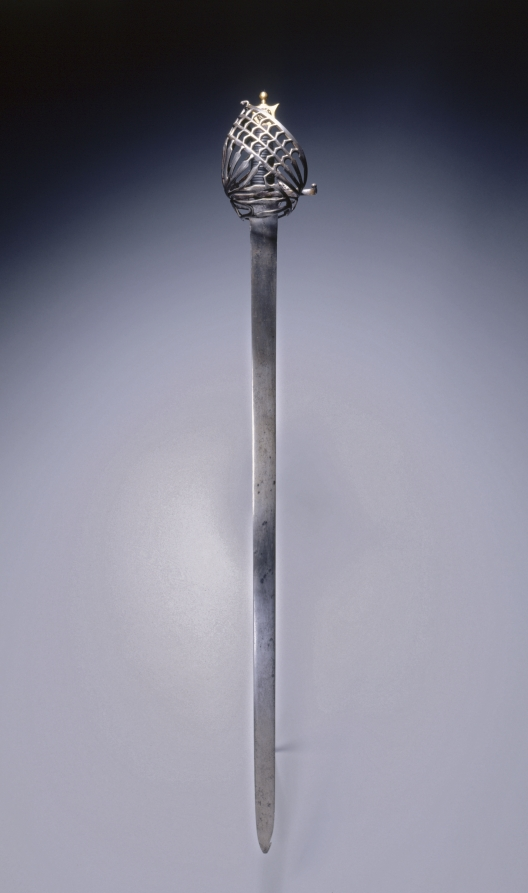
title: Schiavona Broadsword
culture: Italy, Venice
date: early 1700s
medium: steel, leather, wood, brass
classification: Arms and Armor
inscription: blade inscribed: POTZDAM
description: The schiavona-type broadsword features a complex barred guard that slopes forward. Its name derives from the Italian word for "Slavonic" and refers to the Slavonian corps who served as bodyguards to the Doge of Venice until the end of the Venetian Republic in 1797. Such swords were popular mainly with Venetians.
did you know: Usually used by the military, a broadsword has a straight, wide, two-edged blade a with basket-shaped guard that helps protect the hand.